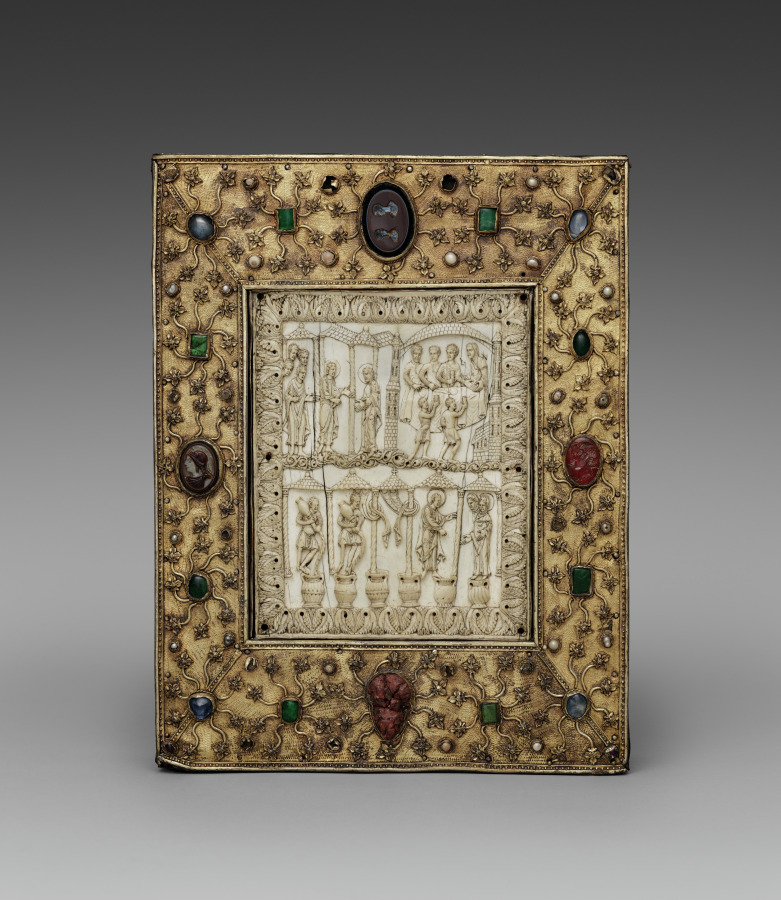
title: Book-Shaped Reliquary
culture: Ivory: Ottonian, Lorrain; Frame: Germany, Lower Saxony, Brunswick, Gothic period, 14th century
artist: circle of The Master of the Registrum Gregorii (German, active c. 972–1000)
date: c. 1000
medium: ivory, silver: gilded, pearls, rubies, emeralds, crystals, onyx, carnelian, oak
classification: Metalwork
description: This sumptuous object closely resembles a deluxe medieval book cover in both form and decoration. It was likely commissioned by Otto the Mild, Duke of Saxony (reigned 1318–48) around 1340. It was made to contain a leaf from each gospel and relics of the 11,000 virgins and 4 other saints. These relics were originally kept in a cavity behind the delicately carved ivory plaque depicting scenes from the Wedding at Cana (John 2:1–11). The story of Christ's first miracle is presented in three scenes. In the upper left, the Virgin informs Christ and his apostles of the lack of wine at the wedding banquet. On the right, the groom, his bride, and their guests sit behind a table, two servants offering them goblets. In the lower register, two attendants pour water into the first of six storage vessels while Christ addresses his mother and the bride. The back of the reliquary shows the engraved figures of the main patron saints of Brunswick Cathedral: placed within a delicate Gothic architectural frame, Saint John the Baptist is flanked by Saints Blaise and Thomas Becket.